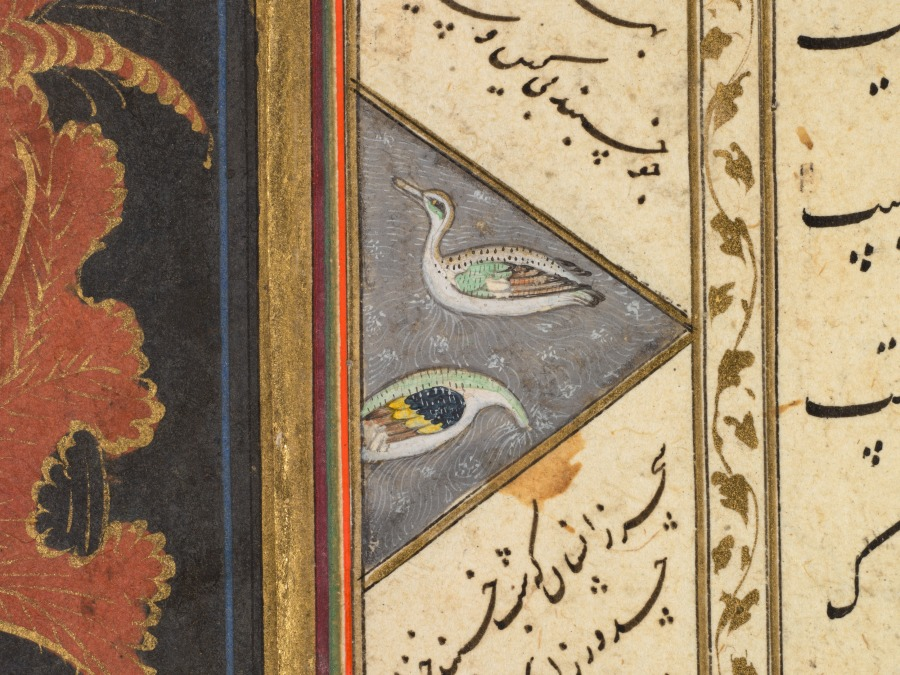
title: Folio B: Folio from the "Five Treasures" (Panj Ganj) of Jami (recto)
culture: Northern India, Mughal, early 17th century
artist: Mushfiq (Indian, active early 1600s)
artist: and others (Indian)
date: 1520–1607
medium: Gum tempera, ink, and gold on paper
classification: Painting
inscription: The miniature signed at upper left: ' amal - i Mushfiq sana 1015 (the work of the Mushfiq year 1015) Text on verso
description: This page contains two different texts, one written diagonally in the border and the other in the two central columns. The section of poetry in the border describes an episode from Joseph’s childhood in which his older brothers suggest to Jacob, their father, that they take Joseph into the countryside so that the boy can learn the area, although they actually plan to kill him. The poem in the central columns advises the reader to smile often, as a smile is sweeter and more pleasing than sugar.